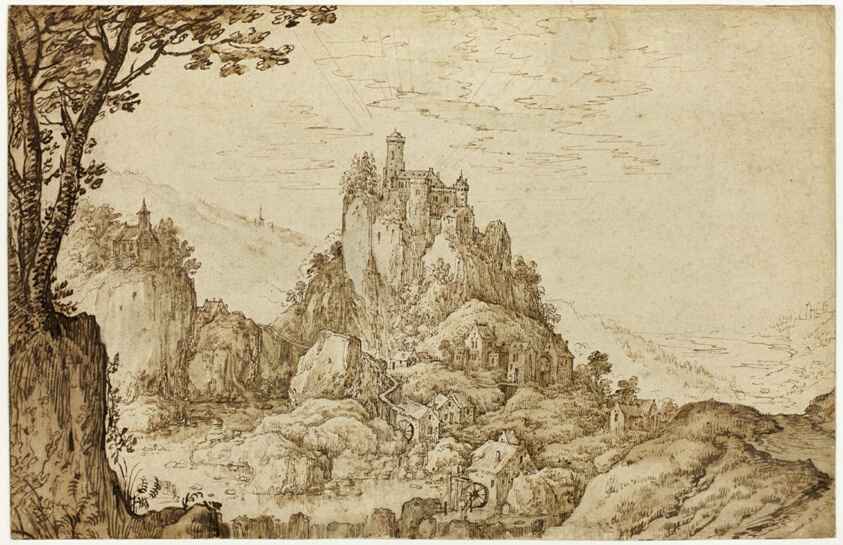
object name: Drawing and Watercolor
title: A Castle on a Crag in a Mountainous Landscape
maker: Joos de Momper; Flemish, 1564–1635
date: late 1590s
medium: Pen and brown ink, with brush and brown ink wash and touches of black ink wash, over traces of black chalk, on cream laid paper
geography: Flanders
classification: pen and ink drawings; prints and drawing; paper